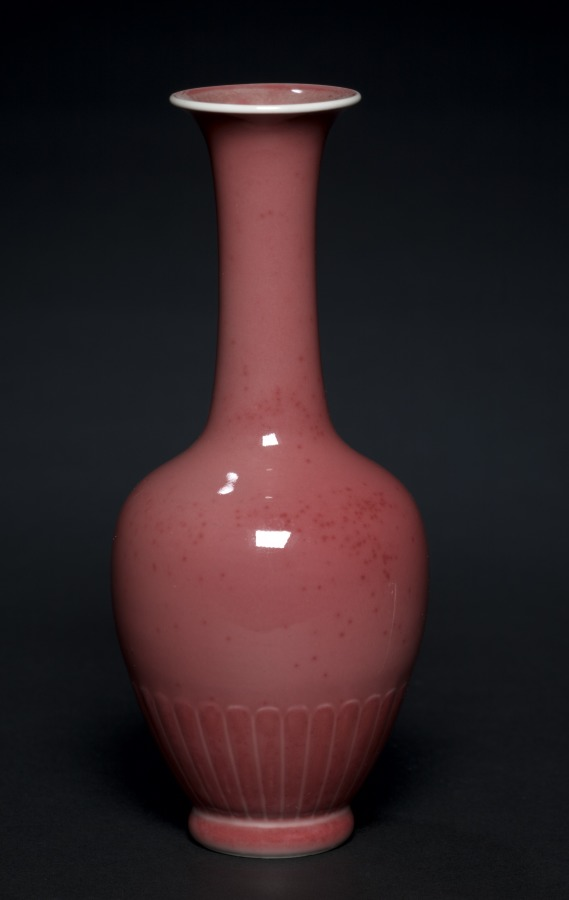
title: Pair of Lotus Petal Vases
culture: China, Jiangxi province, Jingdezhen, Qing dynasty (1644-1911), Kangxi period (1662-1722)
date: 1662–1722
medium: porcelain with "peach bloom" glaze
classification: Ceramic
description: The "peach-bloom" glaze developed during the Kangxi era has also been described as "drunken with beauty." Technical achievements were transcended with aesthetic associations, revealing the greatest sensitivity to all things beautiful in nature.